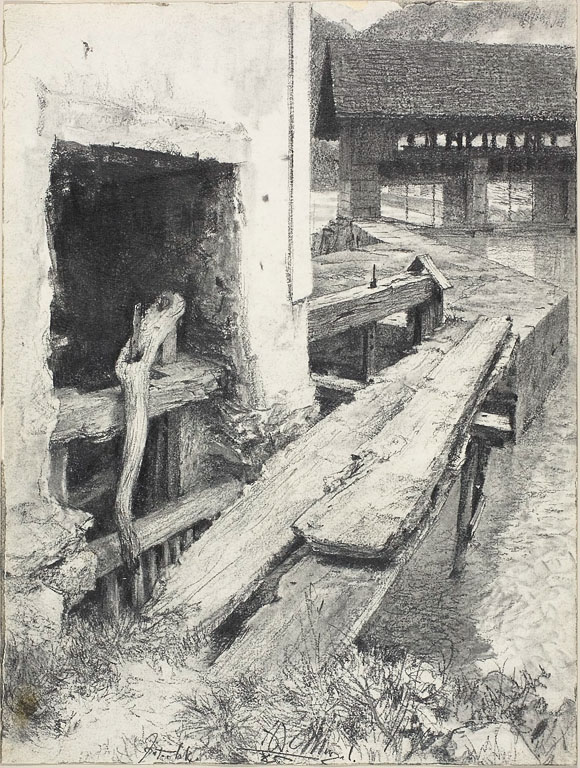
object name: Drawing and Watercolor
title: Sluice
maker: Adolph Menzel; German, 1815–1905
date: 1885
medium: Graphite with stumping on ivory wove paper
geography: Germany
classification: charcoal; drawings (visual works); prints and drawing